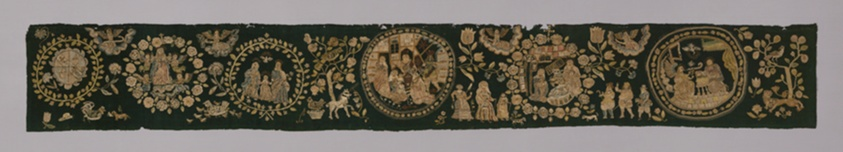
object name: Textile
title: Portion of a Longer Hanging Border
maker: Italy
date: 17th century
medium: Dark green woolen material embroidered with colored silk and gold thread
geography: Italy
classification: textile; needlework (visual works)